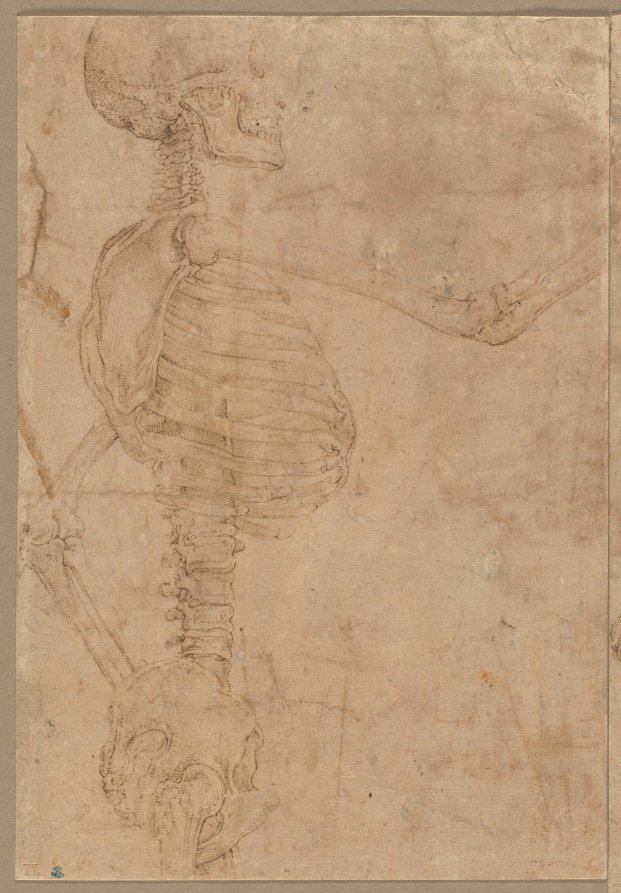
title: Half-Length Skeleton in Profile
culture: Italy, 16th century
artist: Battista Franco (Italian, 1498?–1561)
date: early 1540s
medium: pen and brown ink; incised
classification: Drawing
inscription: VERSO OF SECONDARY SUPPORT, lower left, in graphite: 4 .